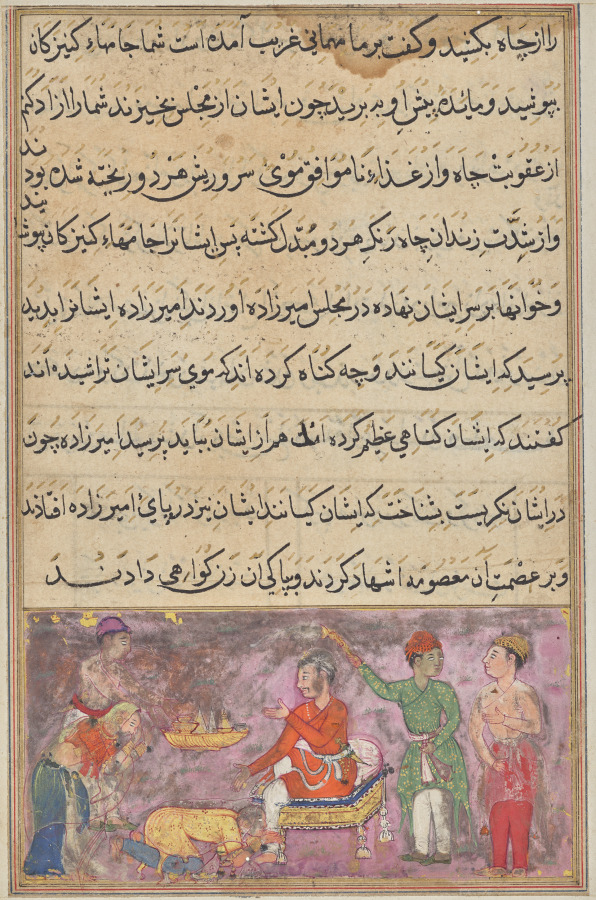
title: The two erring cooks, dressed as maidservants, fall at the prince’s feet and beg forgiveness, from a Tuti-nama (Tales of the Parrot): Fourth Night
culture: Mughal India, court of Akbar (reigned 1556–1605)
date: c. 1560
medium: gum tempera, ink, and gold on paper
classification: Painting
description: Seated on a fine stool in the center, the king is astonished to receive his two handsome cooks, whom he had sent to seduce his soldier’s faithful wife. After she trapped them and kept them prisoner for weeks until the arrival of the king, she shaved their heads and forced them to dress as female servants to shame them for testing her fidelity. Some folios in this manuscript were altered from their original compositions, creating discoloration in many areas. The yellow background was changed to lavender, the legs of the stool were shortened, and the king’s bolster lowered. The manuscript’s patron, the Mughal emperor Akbar, brought artists from many regions of India to work in his court, and some of their compositions and color choices were updated, apparently after they learned of Akbar’s stylistic preferences. This important manuscript, which is almost entirely in the Cleveland Museum of Art’s collection, is critical for understanding the early development of Mughal painting.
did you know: Despite their disguises, the prince recognizes the two cooks.